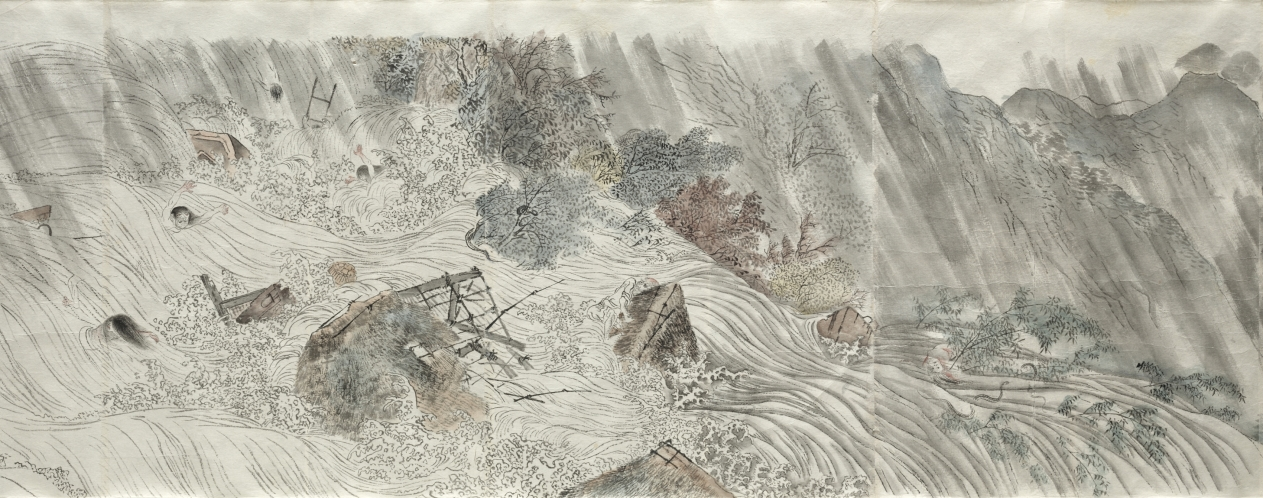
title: Sketch Copy of Natural Disasters, from the Seven Fortunes and Misfortunes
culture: Japan, Edo period (1615–1868) to Meiji period (1868–1912)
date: after 1773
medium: handscroll; ink and color on paper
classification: Painting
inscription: Signed: Gettcho; dated 1773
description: This unmounted handscroll is a copy of the first of a three-scroll set painted by Maruyama Ōkyo (1733–1795) for Buddhist monk Yujō (1723–1773). It depicts people's unfortunate encounters with forces of nature from wind to beasts. Ōkyo's realistic, contemporary imagery was meant to evoke a sense of recognition and empathy in viewers, shocking them into avoidance of possible punishments.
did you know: Notations that appear throughout the scroll indicate colors and other details of the original painting.